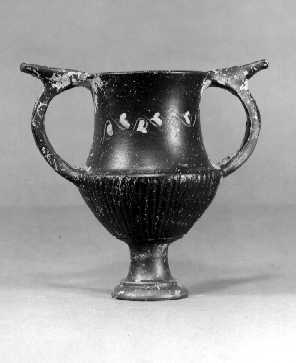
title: Black-Gloss Kantharos (Drinking Cup)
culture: Greek, Attic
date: c. 300–275 BCE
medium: ceramic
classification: Ceramic